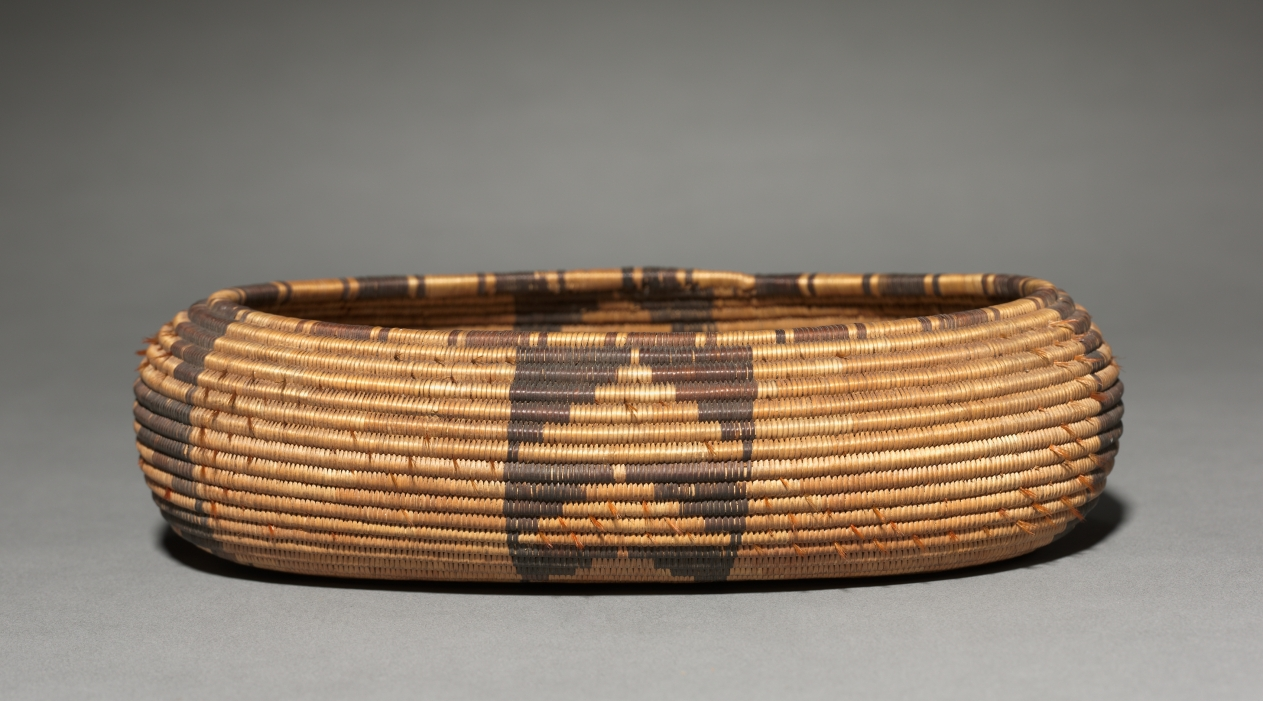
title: Gift Bowl, Canoe- Shaped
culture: California, Pomo, late 19th- early 20th century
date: 1890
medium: Willow, Bulrush, Sedge, with feather and acorn woodpecker; coiled (3 rods)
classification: Basketry